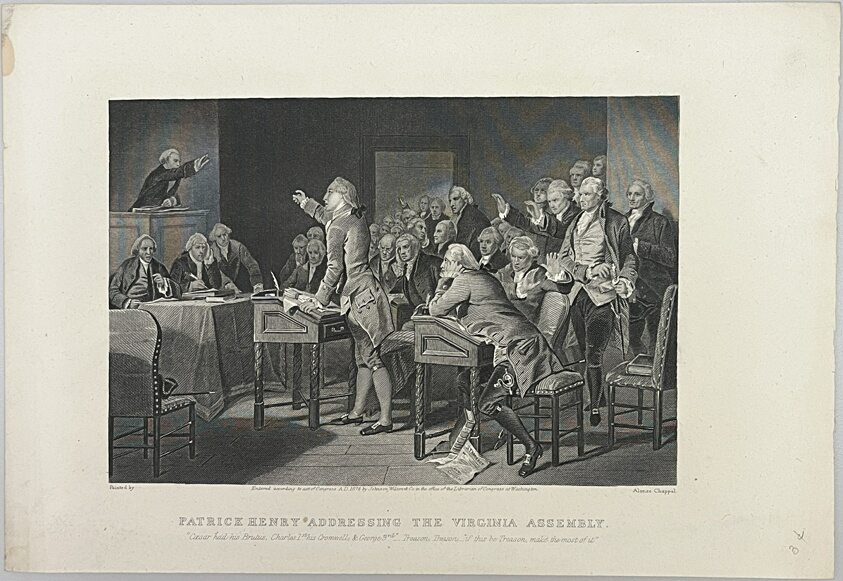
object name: Print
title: Patrick Henry addressing the Virginia Assembly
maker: Henry Bryan Hall (American, 1808-1884); after Alonzo Chappel (American, 1828-1887)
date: 1874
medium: Steel engraving on paper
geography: United States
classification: reproduction; print; prints and drawing